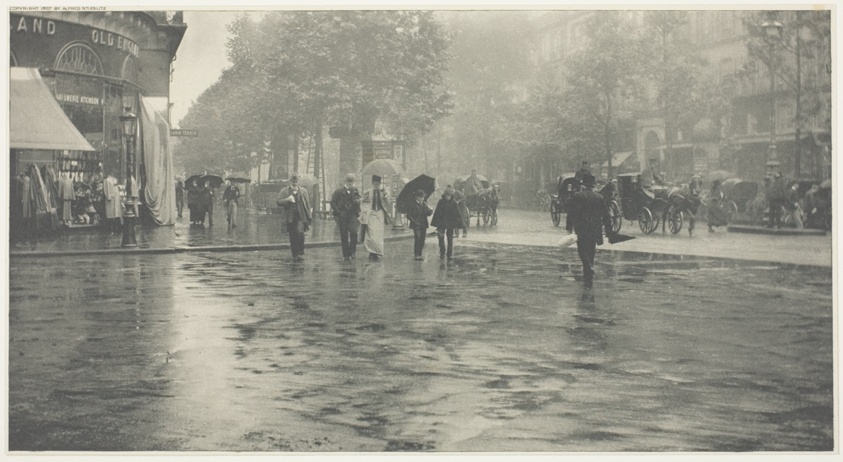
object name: Photograph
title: A Wet Day on the Boulevard, Paris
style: Pictorialism, 19th century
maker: Alfred Stieglitz; American, 1864–1946; Publisher: R. H. Russell; American, Unknown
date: 1894, printed c. 1897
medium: Photogravure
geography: New York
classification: photogravure; photomechanical process; photography; photograph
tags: Paris, cityscapes